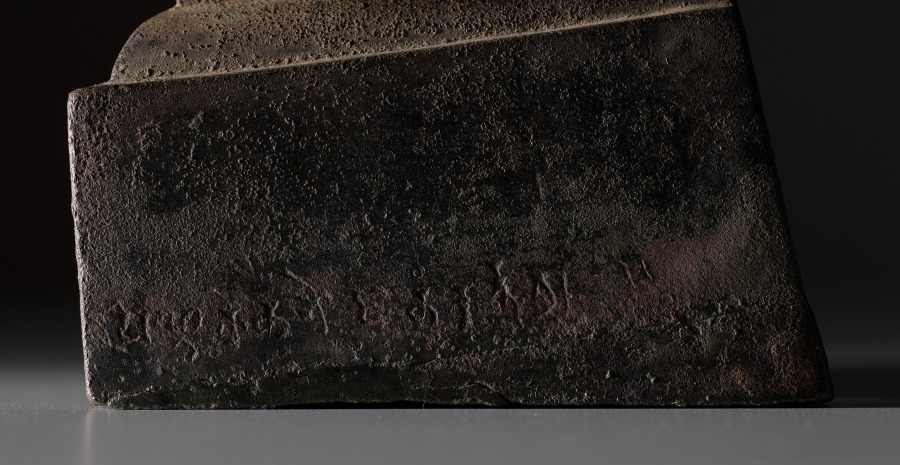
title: Standing Buddha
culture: Northern India, Uttar Pradesh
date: 591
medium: bronze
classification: Sculpture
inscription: 1. ṹ deyadharmmoyaṃ laḍitagrāme yaṃgvalvihāre śā[kya] bhikṣuṇyā 2. pariśuddhamatyā yadattra puṇyaṃ tadbhavatu sarvvasatvānā- 3. manuttarasarvva jñānāvāptaye/ / saṃvat 4a. 500 10 3/ / caityakūta jinabandhuvihārapūrvva-bhuddeśe 4b. piṇḍakena bhojanaṃ karttavya*/ / *Mistake for karttavyam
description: This bronze Buddha is exceptional, because it carries an inscription on its base that dates its manufacture to the year 591. According to the inscription, the sculpture was dedicated by a nun who was from a village in Nepal, but she probably commissioned it at a workshop in northern India. The Buddha's robe on this image has been left plain, without pleat lines to obscure the beauty of the contours of the body. Only the rippling scalloped clusters of the garment’s hem lend some sense of energy and subtle ornament to the composition.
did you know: Around the time when this sculpture was made, portable bronzes began to replace relics as the principal sacred commodity circulating in the Buddhist world.